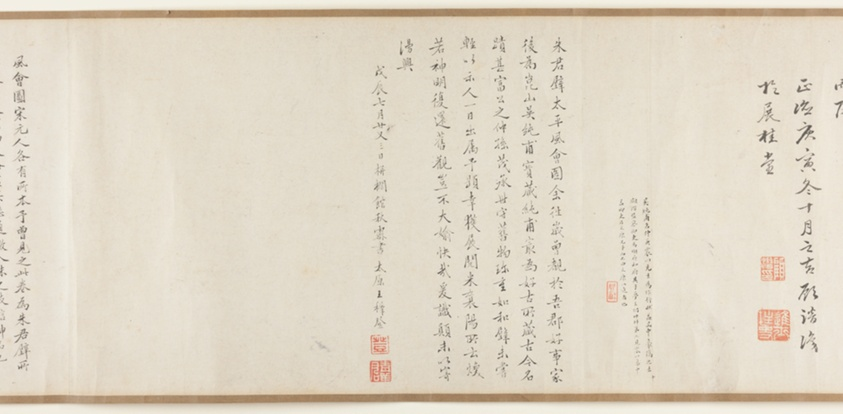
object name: Painting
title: Street Scenes in Times of Peace 太平風會圖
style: Chinese (culture or style)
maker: Zhu Yu (Zhu Junbi) 朱玉（朱君璧）; Chinese, 1293-1365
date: Yuan dynasty (1279–1368), 14th century 元朝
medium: Handscroll; ink and colors on paper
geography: China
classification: handscroll; painting; asian art